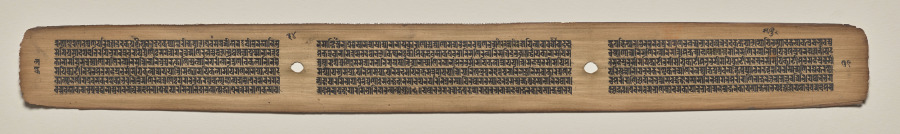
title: Text, Folio 34 (verso), from a Manuscript of the Perfection of Wisdom in Eight Thousand Lines (Ashtasahasrika Prajnaparamita-sutra)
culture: Eastern India, Bihar, Vikramashila Monastery. Painting: Nepal, Kathmandu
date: Sunday, September 14, 1119 (year 239 of the Newar Samvat in the month of Ashvina)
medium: gum tempera and ink on palm leaves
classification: Painting